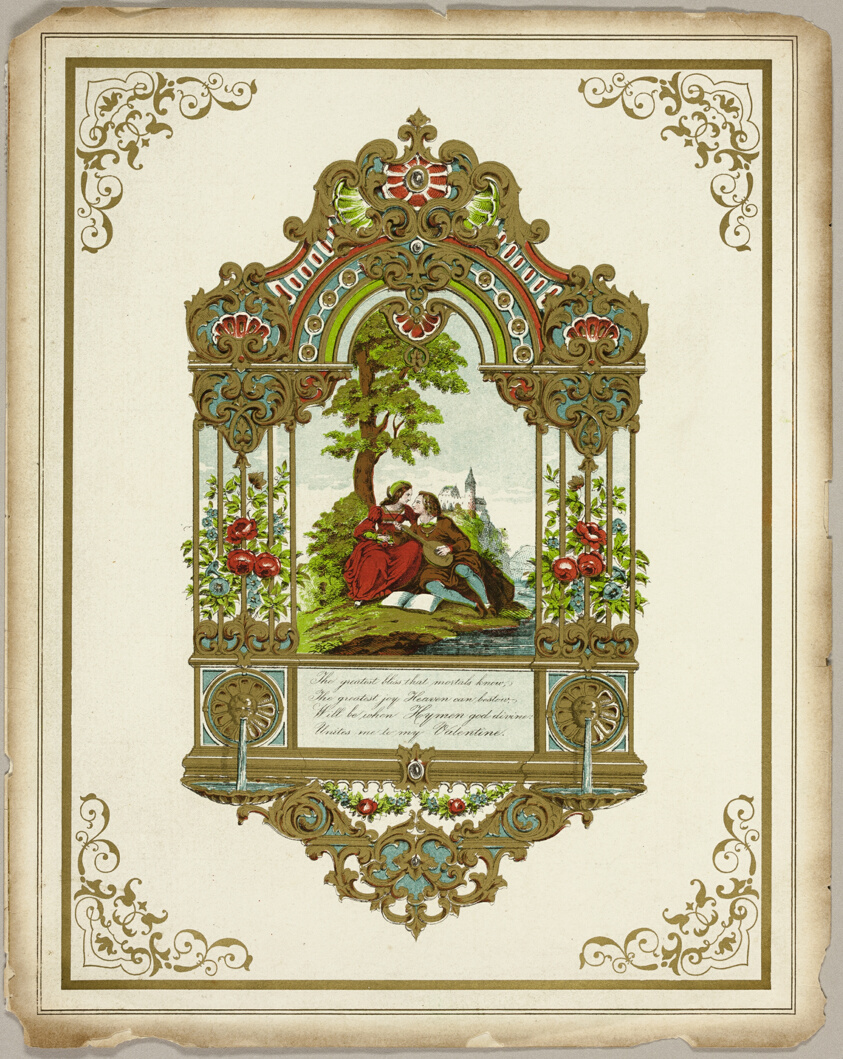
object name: Print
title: The Greatest Bliss that Mortals Know (valentine)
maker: Unknown Artist; English, 19th century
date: c. 1850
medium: Lithograph with hand-coloring on ivory wove paper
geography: England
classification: valentine; prints and drawing; print